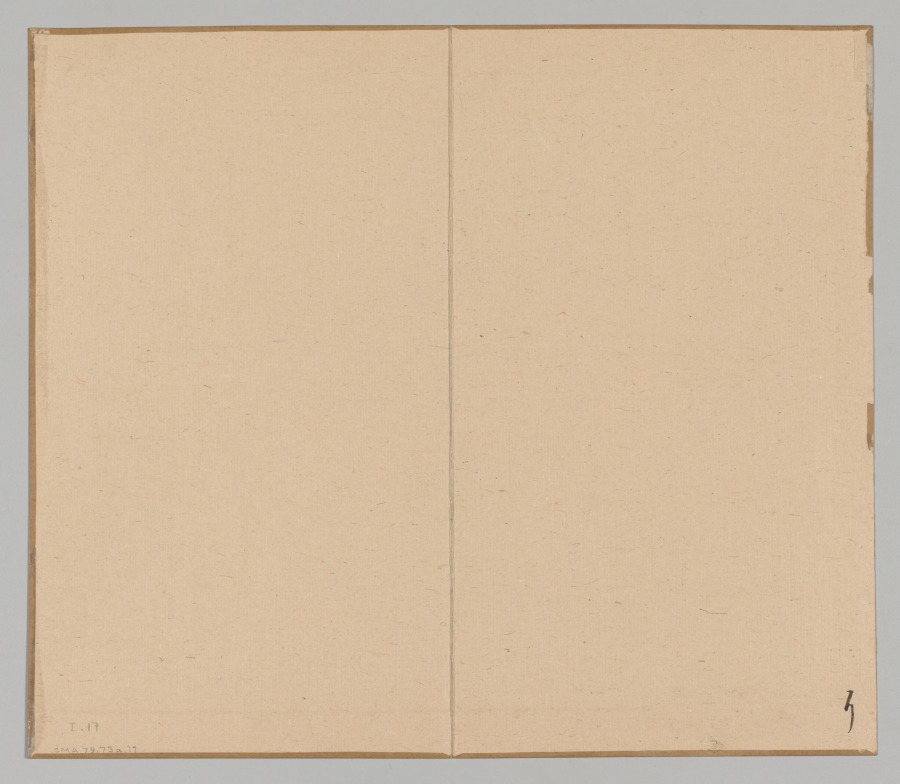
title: Reverberations of Taiga, Volume 1 (leaf 17)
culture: Japan, Edo period (1615–1868)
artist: Aoki Shukuya (Japanese, d. 1802)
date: mid- to late 1700s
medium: double-leaf from a pair of albums; ink and light color on paper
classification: Portfolio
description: Traditionally, young painters in Japan began their studies with an established master-painter. The master's compositions invariably became models that the apprentice copied to learn various ink and brush techniques. Shukuya was a pupil of the famous Kyoto artist Ikeno Taiga, whose style is reflected in these sketches of rocks, trees, and mountains.